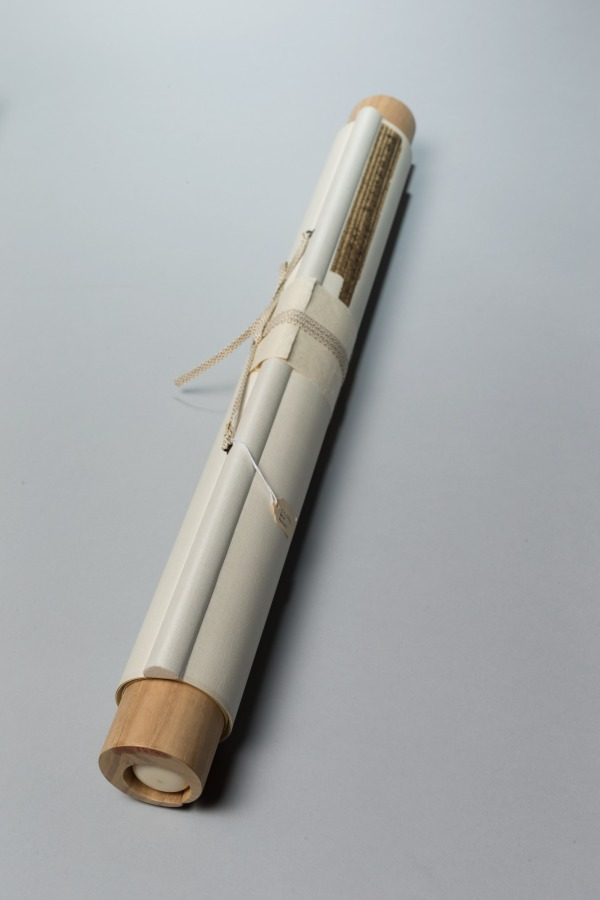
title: Thin Forest and Distant Mountains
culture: China, Ming dynasty (1368–1644)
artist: Li Liufang (Chinese, 1575–1629)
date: 1628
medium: hanging scroll, ink on paper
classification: Painting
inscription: Artist's inscription, signature, and 2 seals: Thin forest and distant mountains have always attracted me; As if they were from the brush and ink of Ni Tsan, left behind by the master in this mortal world. Now that the quiet recluse has chosen to live in the South of the City. He paints the spring breeze---over a curve of the river. In the spring day of the wu-ch'en year [1628] I made this painting and attached an old poem. Li Liu-fang [seals] Li Liu-fang-yin; Chang-heng shih. trans. WKH 1 additional seal of Chung Wen-ming (17th c.).